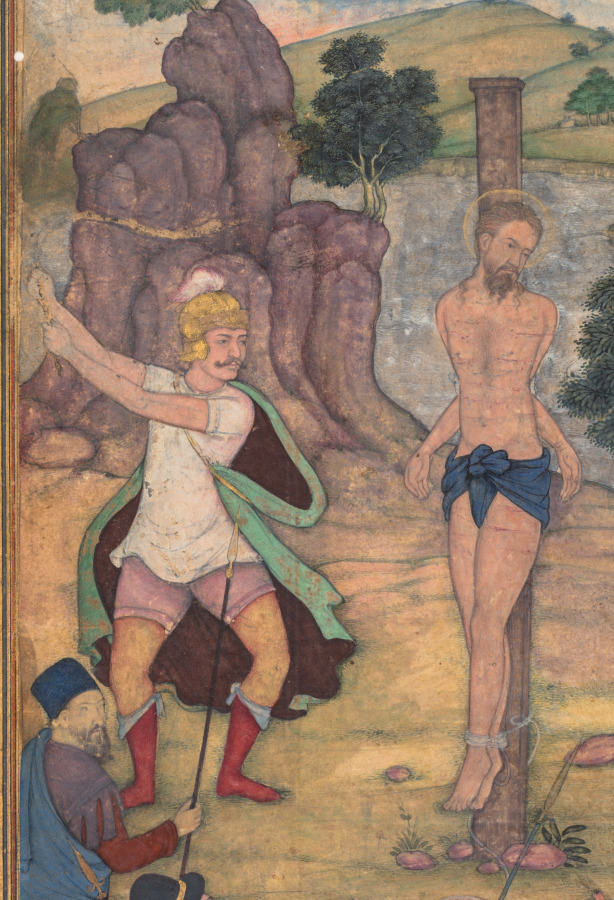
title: The Flagellation (folio 182 recto), from a Mirror of Holiness (Mir’at al-quds) of Father Jerome Xavier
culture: Mughal India, Allahabad, made for Prince Salim (1569–1627)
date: 1602–4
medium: Gum tempera, ink, color, and gold on paper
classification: Manuscript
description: Two Romans flog Jesus, who has been bound to a stake at the center of the circular composition made up of soldiers and the hilly horizon. His subtly articulated expression conveys both pain and compassion, as he endures cuts to his flesh and the bindings around his elbows that secure him so tightly to the post that his feet are elevated off the ground. This is the last illustration in the Cleveland manuscript of the Mirror of Holiness. The Crucifixion was never illustrated, possibly because the patron, Prince Salim, was Muslim. According to the Koran, Jesus did not die on the cross, but was absorbed into heaven by Allah.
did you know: A halo encircles Jesus’s head, and his hair and beard are highlighted with gold.